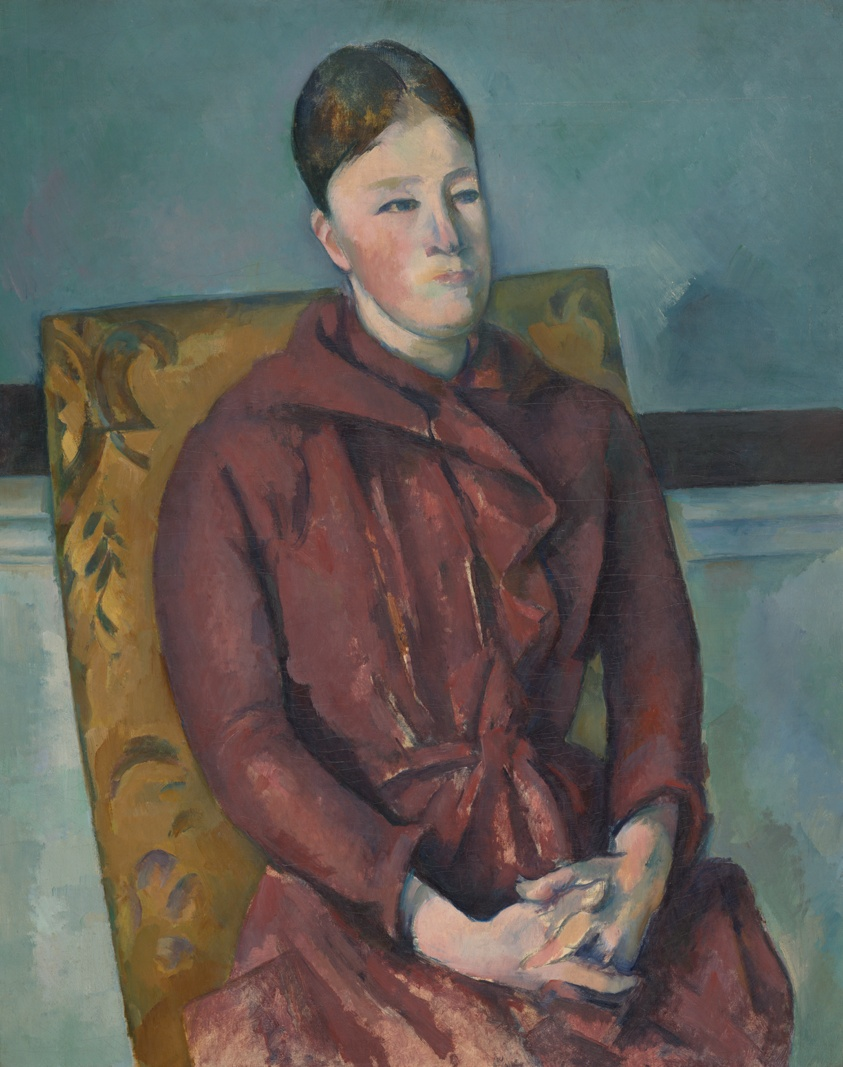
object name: Painting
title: Madame Cezanne in a Yellow Chair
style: Post-Impressionism, 19th century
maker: Paul Cezanne (French, 1839–1906)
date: 1888-90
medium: Oil on canvas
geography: France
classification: oil on canvas; french; oil paintings (visual works); paint; painting; european painting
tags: portraits, chair, interior, portraits: European subject, portraits: female subject, portraits: French subject, emotions, women, families